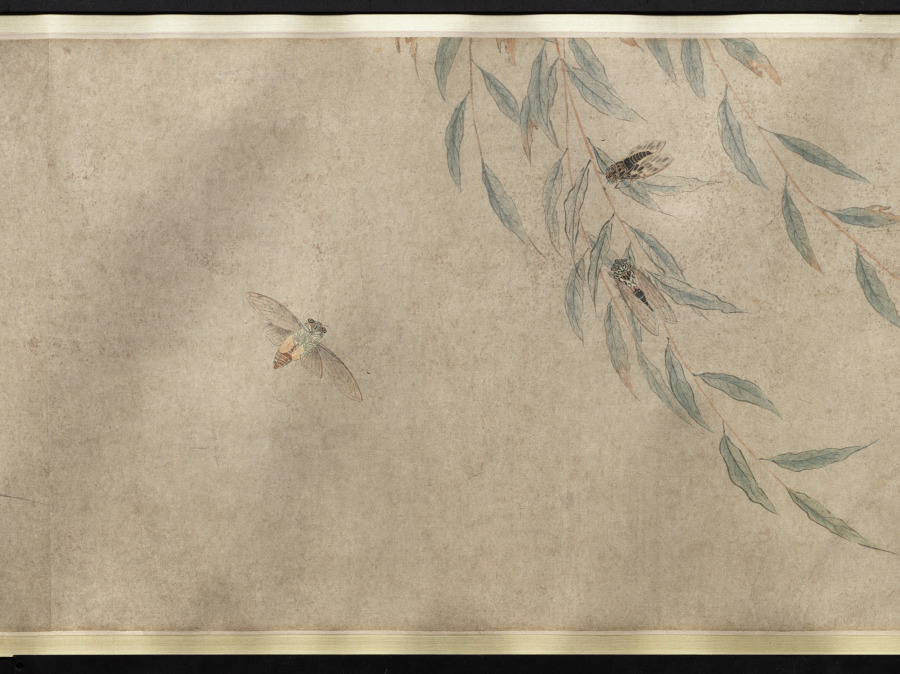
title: Insects and Flowers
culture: China, Qing dynasty (1644-1911) or Republican period (1912-49)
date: c. 1900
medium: Handscroll, ink and color on paper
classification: Painting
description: More than 26 feet long, this scroll presents insects, reptiles, and plants in delicate brushwork and pale colors, referring in style to earlier Southern Song dynasty (1127–1279) bird-and-flower paintings. Upon closer inspection, ants dismember a butterfly and reptiles wait to ambush their prey. An inscription at the end of the painting gives us an idea of its meaning: Attributed to the Qing dynasty scholar Zhang Xigeng (張錫庚, 1801–1861), the inscriber relates the work to an earlier painting by Qian Xuan (錢選, c. 1235–before 1307) and further suggests that the painting may allude to the relentlessness of natural selection. By drawing a parallel to tumultuous episodes in Chinese history, the writer might even hint at the domestic rebellions and the aggression of Western powers against China in his lifetime, particularly the Opium Wars (1839–60).